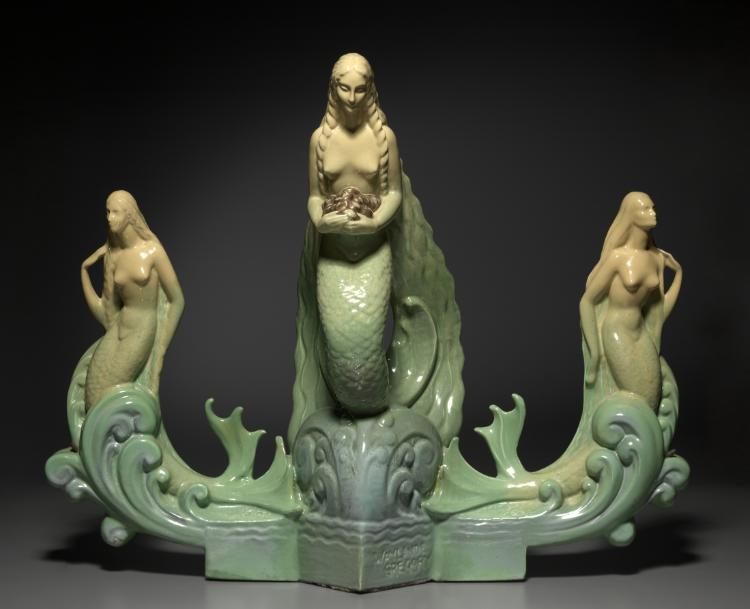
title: Rhine Maidens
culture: America, Ohio, Cleveland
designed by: Waylande Gregory (American, 1905–1971)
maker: Cowan Pottery Studio (America, Rocky River, Ohio, 1920–1931)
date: 1930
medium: glazed earthenware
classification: Ceramic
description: Fresh from study in Europe, Gregory returned to America in 1928 to join the staff at Cowan Pottery Studios, the most prestigious ceramic firm in the Cleveland area at the time. He quickly became their most prolific designer, specializing in sumptuously decorative sculptures of female figures such as Rhine Maidens.